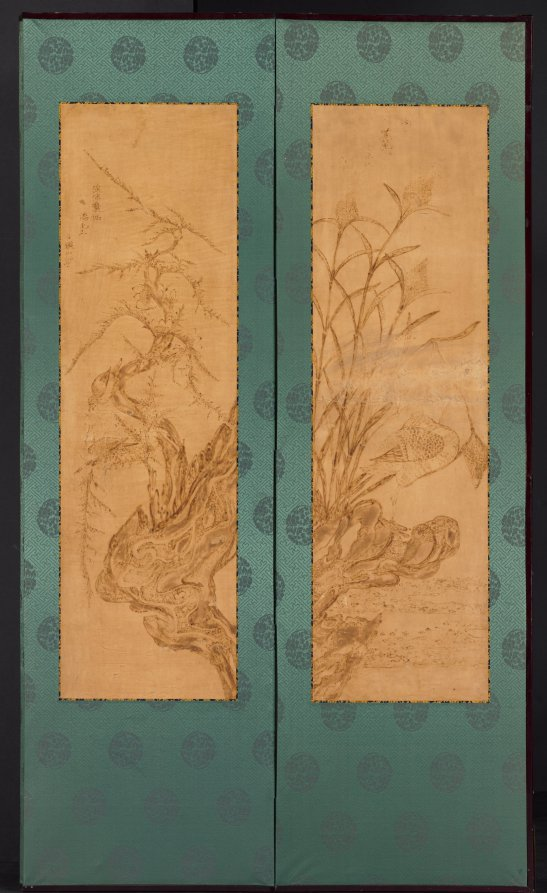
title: Birds and Flowers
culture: Korea, Joseon dynasty (1392–1910)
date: late 1800s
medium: Ten-panel folding screen with designs and inscriptions burnt into paper (pyrography)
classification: Painting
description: The image depicted on this folding screen is not executed in ink, but rather a method called “pyrography" or "nakhwa,” a technique of burning the surface of materials ranging from wood to paper with the delicately controlled application of a heated metal tool. This technique became widely popular in the 19th century. Scorched marks here replace brush strokes. Nakhwa method is now designated as a Korean Intangible Cultural Asset by the Korean government.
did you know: The painting is done by a pyrography method, a technique of burning the surface of materials with a heated tool.